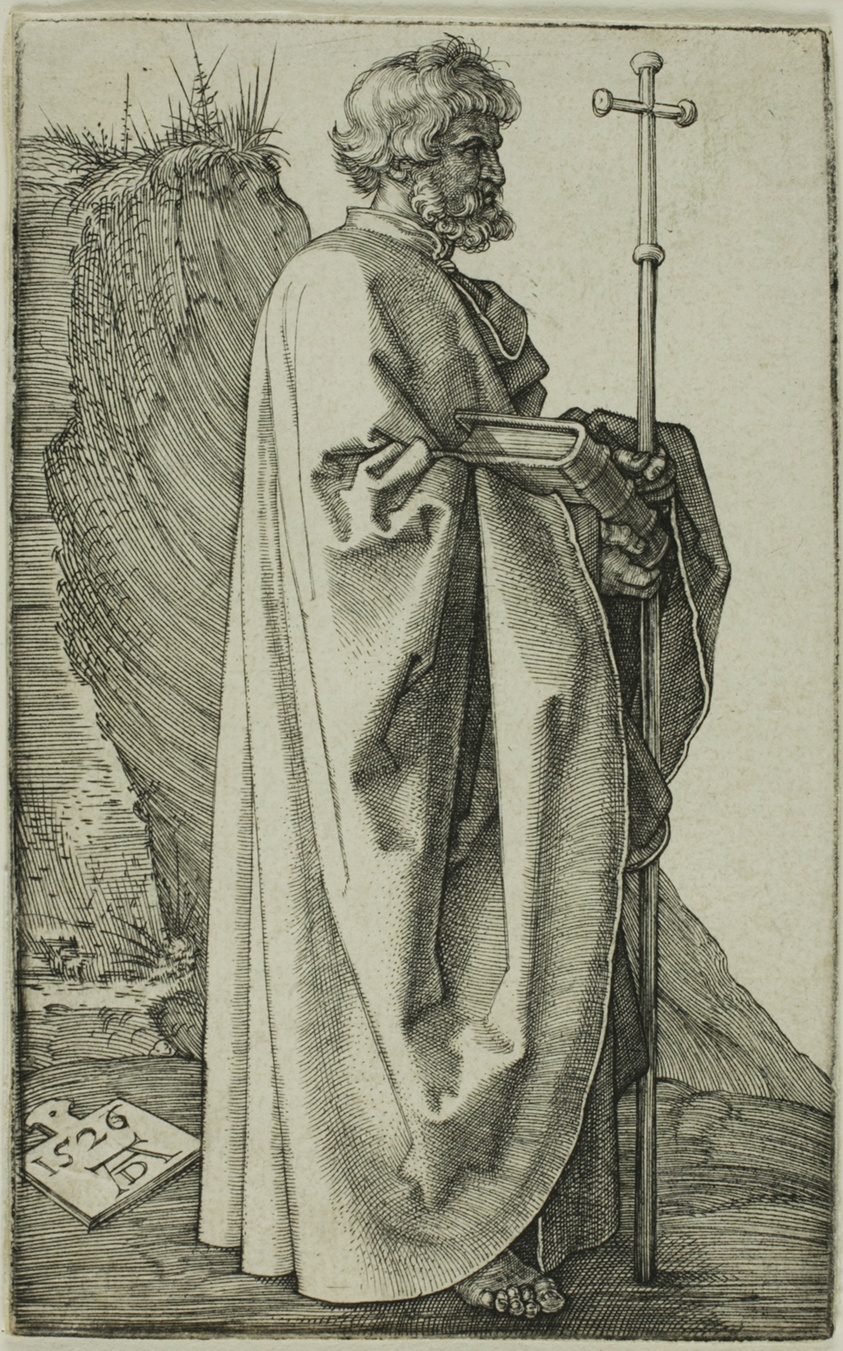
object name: Print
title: St. Philip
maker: Albrecht Dürer (German, 1471-1528)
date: 1526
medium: Engraving in black on ivory laid paper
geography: Germany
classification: engraving; print; prints and drawing; paper